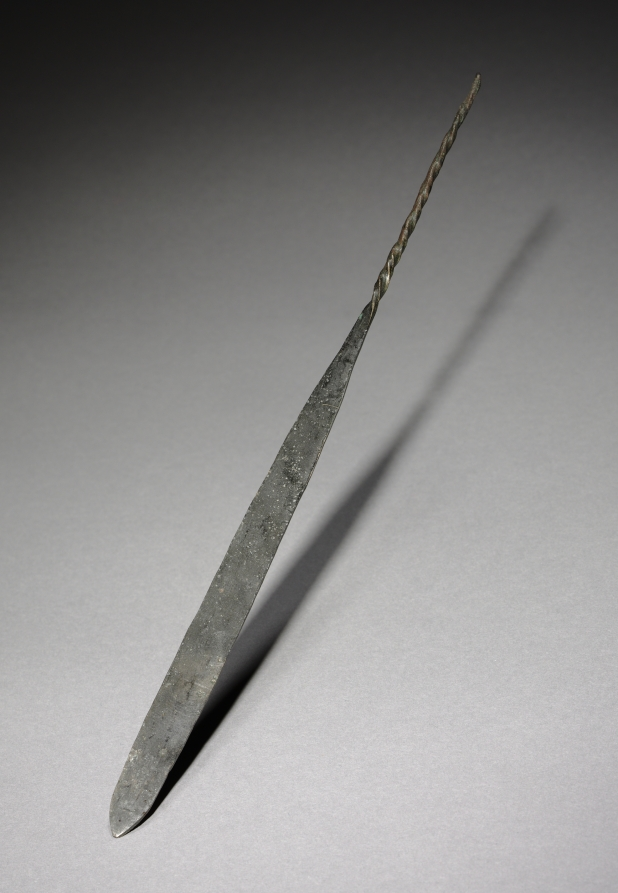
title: Razor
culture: Korea, Goryeo dynasty (918–1392)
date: 918–1392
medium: bronze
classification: Arms and Armor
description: Metalworking techniques advanced remarkably during the Goryeo period (918–1392). Metal objects such as this were used not only as daily accessories, but also as burial goods for commemorating the dead.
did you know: This razor used for tonsure, a practice of shaving a monk's hair.